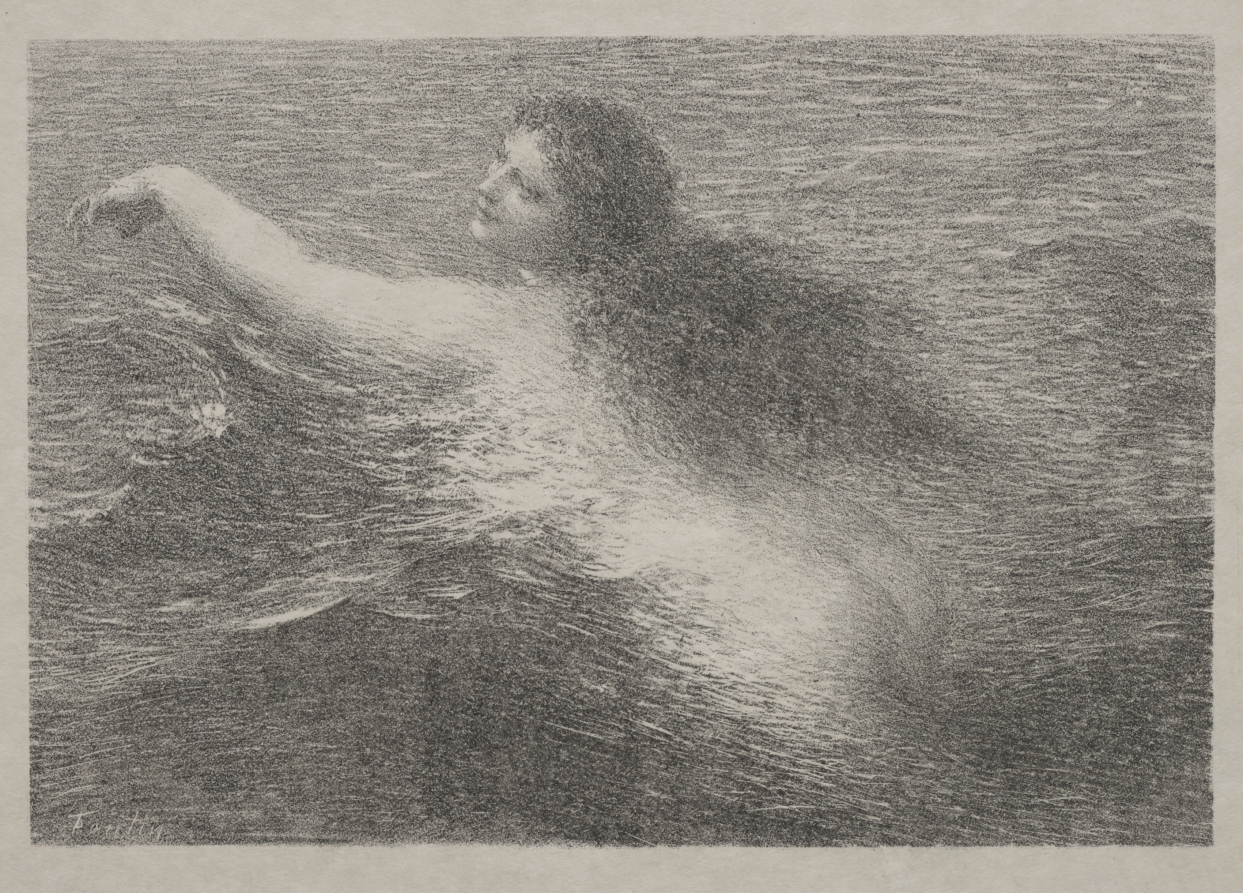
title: The Water Genius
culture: France, 19th century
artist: Henri Fantin-Latour (French, 1836–1904)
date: 1896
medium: lithograph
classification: Print